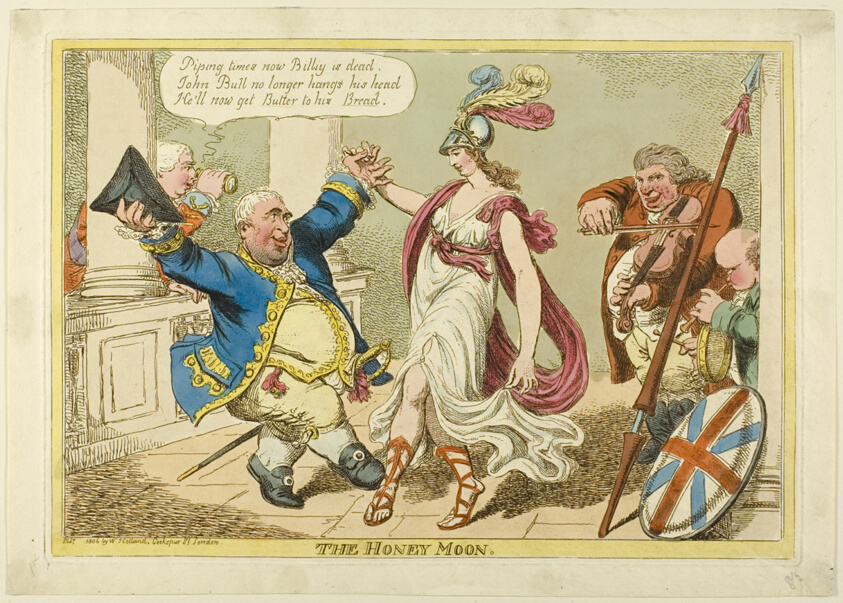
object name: Print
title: The Honeymoon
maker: Charles Williams, English, active 1797-1830; published by William Holland; English, 1757-1815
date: 1806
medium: Etching, with hand-coloring, on paper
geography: England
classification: etching; print; prints and drawing